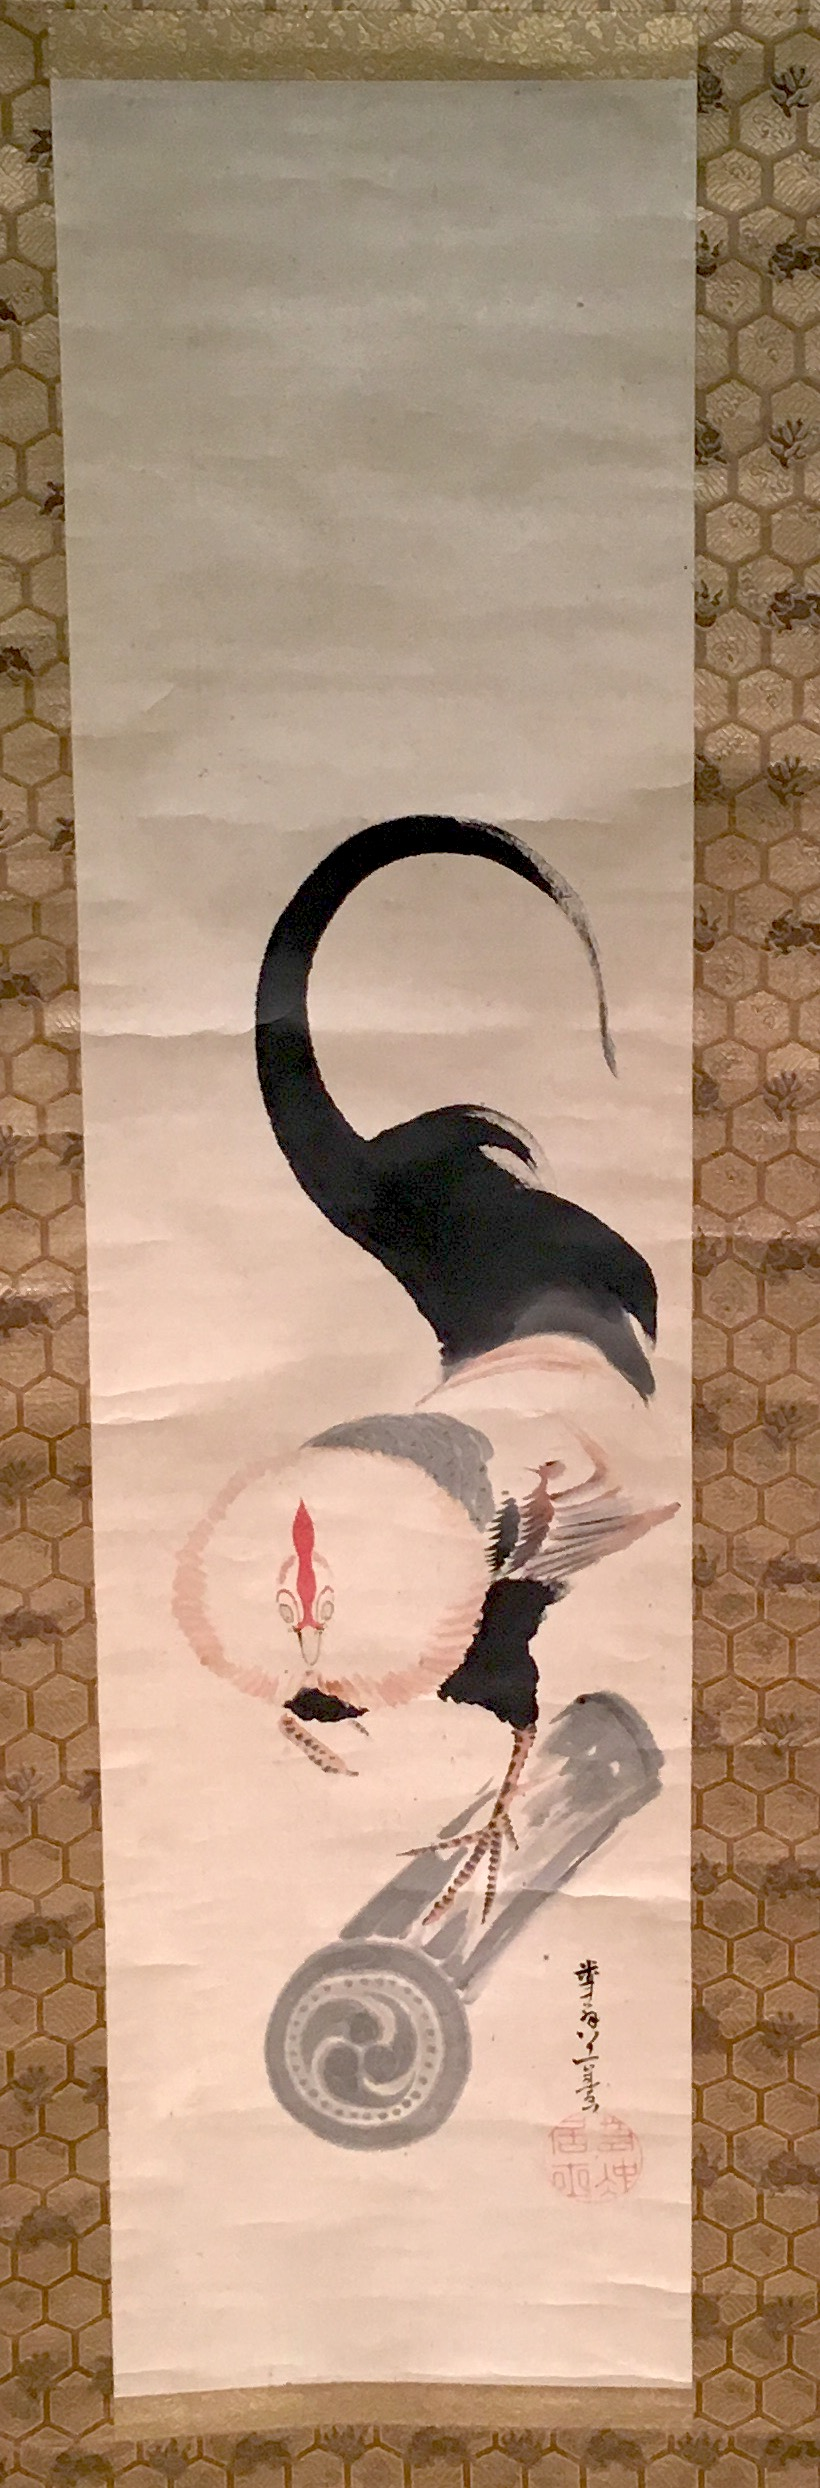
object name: Painting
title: Rooster on tile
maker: Ito Jakuchu,; Japanese, 1716-1800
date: about 1793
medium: Hanging scroll; ink and color on paper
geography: Japan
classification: hanging scroll; painting; asian art